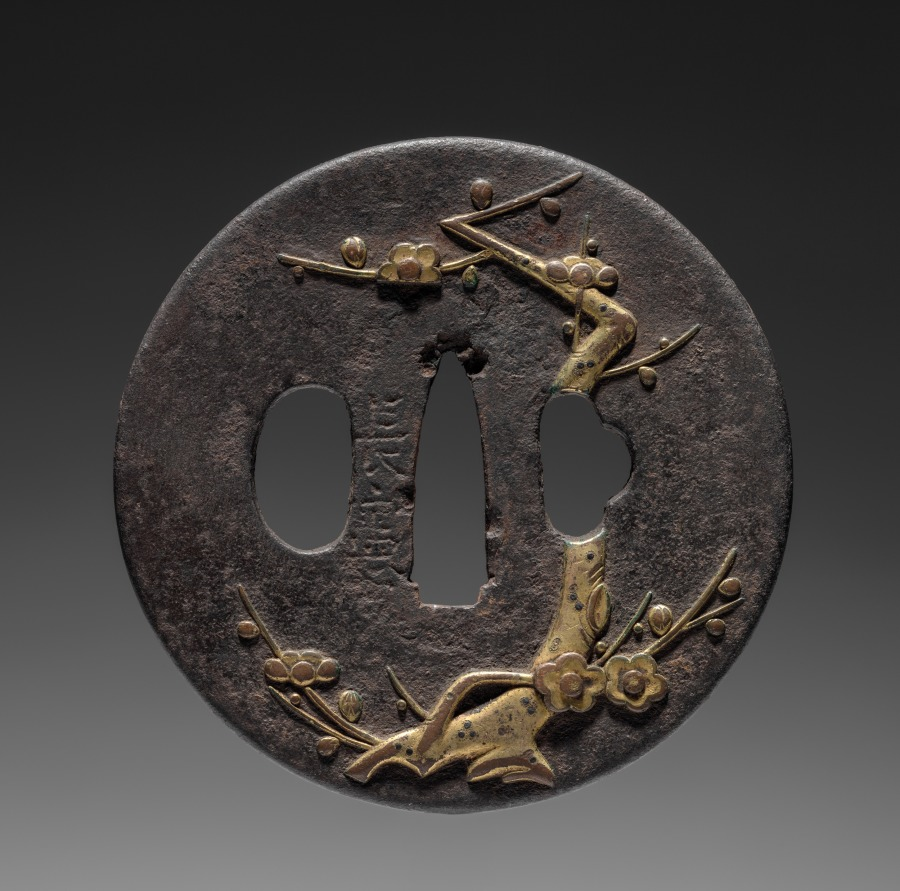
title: Sword Guard (Tsuba)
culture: Japan, Edo period (1615–1868)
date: mid-1800s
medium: iron with high relief of copper gilt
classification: Arms and Armor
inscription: signed "Nagahori."